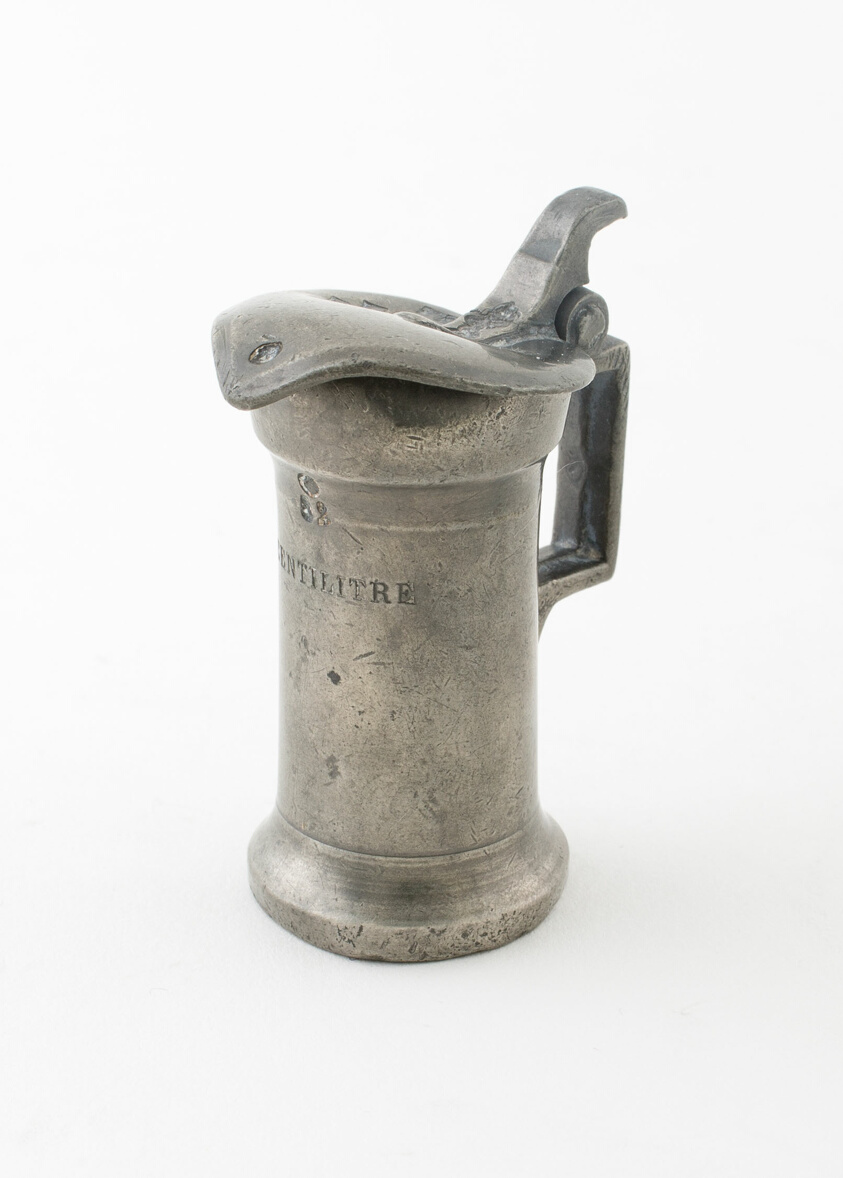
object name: Metalwork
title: Centilitre Measure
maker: Maison Le Seigneur; Deverre; Caen, France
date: 1875/1895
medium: Pewter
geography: Caen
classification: pewter; metalwork; european decorative arts